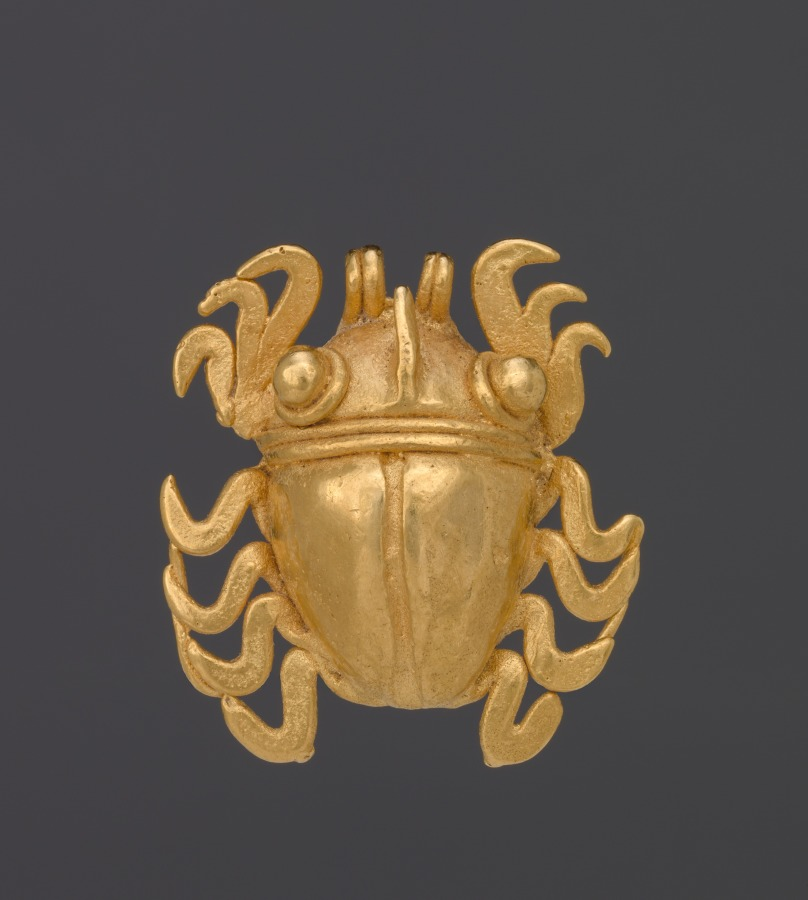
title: Insect Bell Pendant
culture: Isthmian Region (Panama), Coclé, 5th century-12th century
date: 400–1100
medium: gold, cast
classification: Metalwork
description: The identity of the creature depicted in this exquisite small pendant is unclear; it may combine features from the marine and insect worlds. A pellet inside the creature's body rattles when the pendant moves.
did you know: The practice of crafting gold objects in Panama dates back nearly 2,000 years.